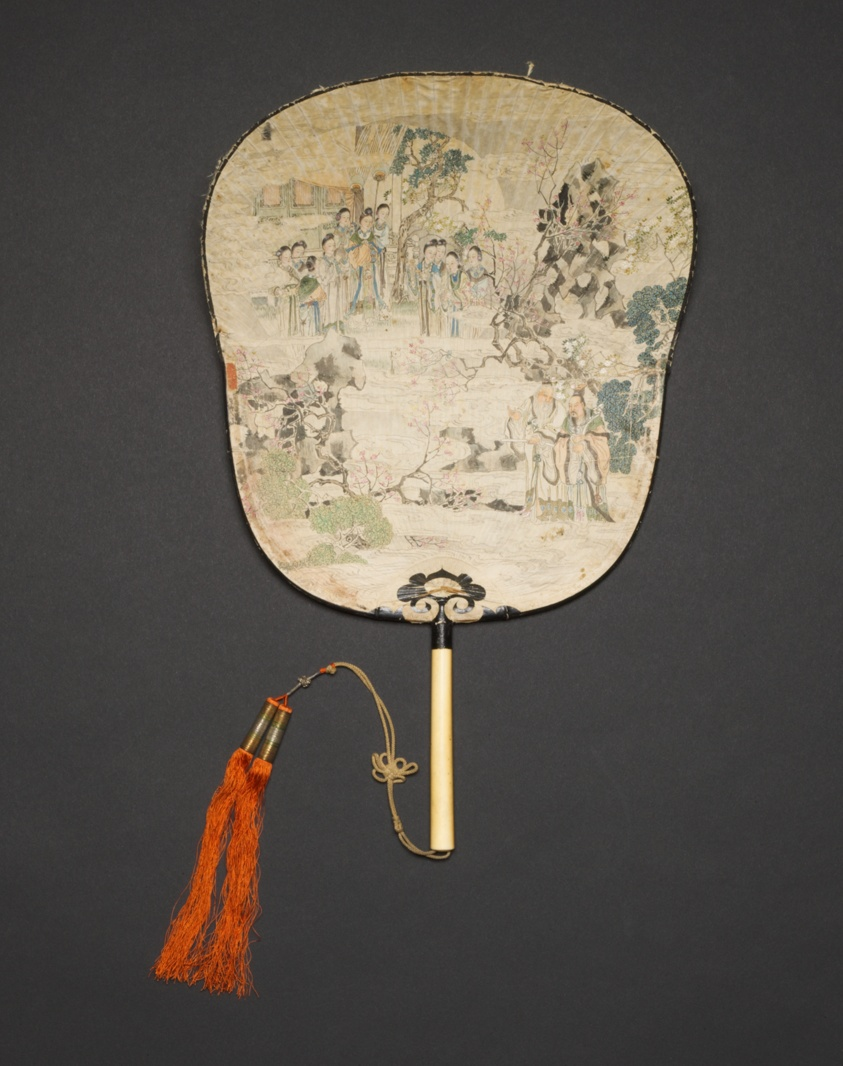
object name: Costume and Accessories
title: The Moon Palace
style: Chinese (culture or style)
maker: China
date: Qing dynasty (1644–1911), 19th century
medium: Fan (shovel-shaped); ink and colors on silk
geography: China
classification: fan; accessories (object genre); asian art; costume